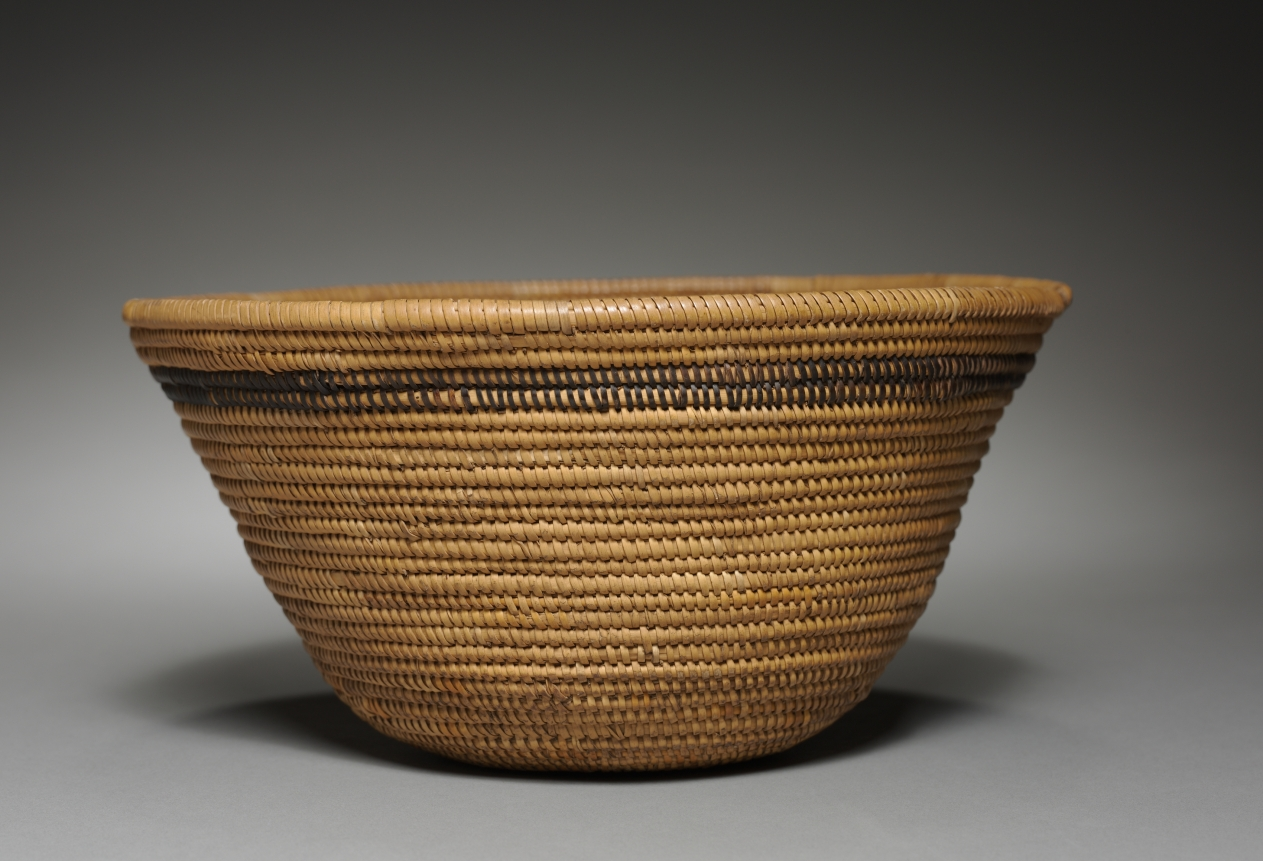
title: Hat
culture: California, Southern, Late 19th- Early 20th century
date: c 1875– 1925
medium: Juncus, Sumac; Coiled; Deergrass foundation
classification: Basketry